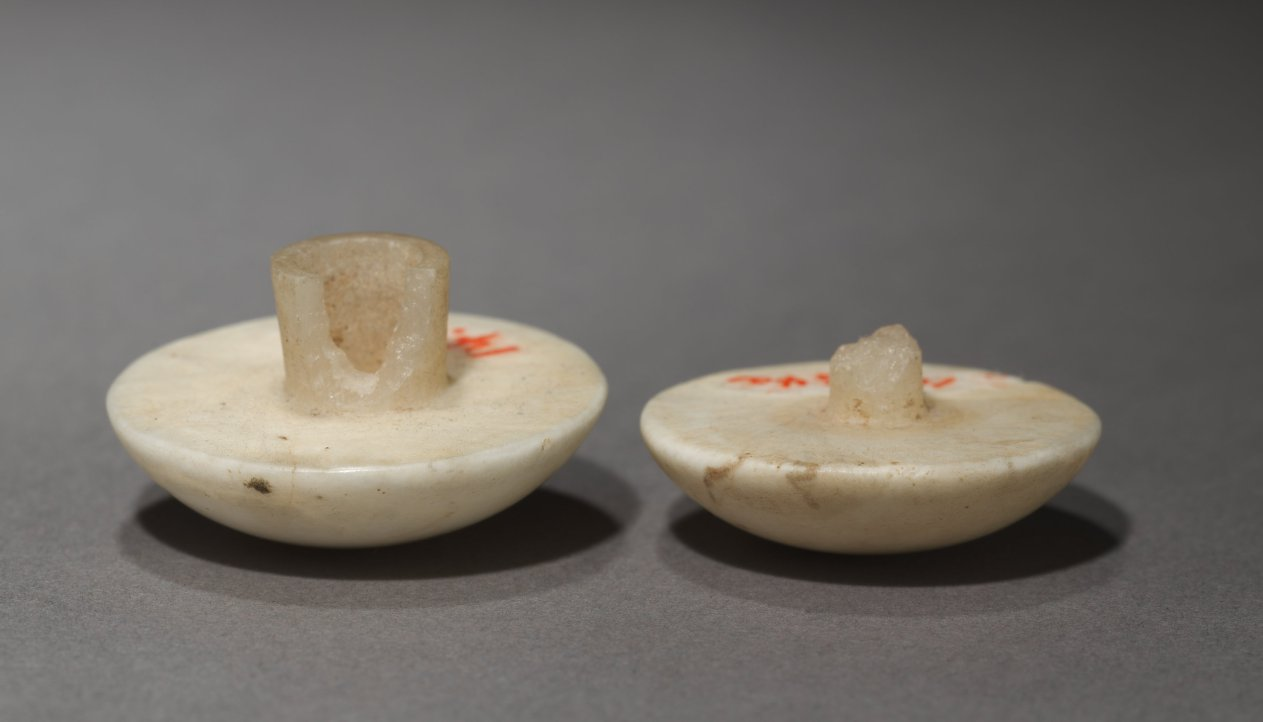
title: Pair of Ear Studs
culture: Egypt, New Kingdom (1540–1069 BCE), Dynasty 18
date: 1540–1296 BCE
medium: travertine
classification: Jewelry